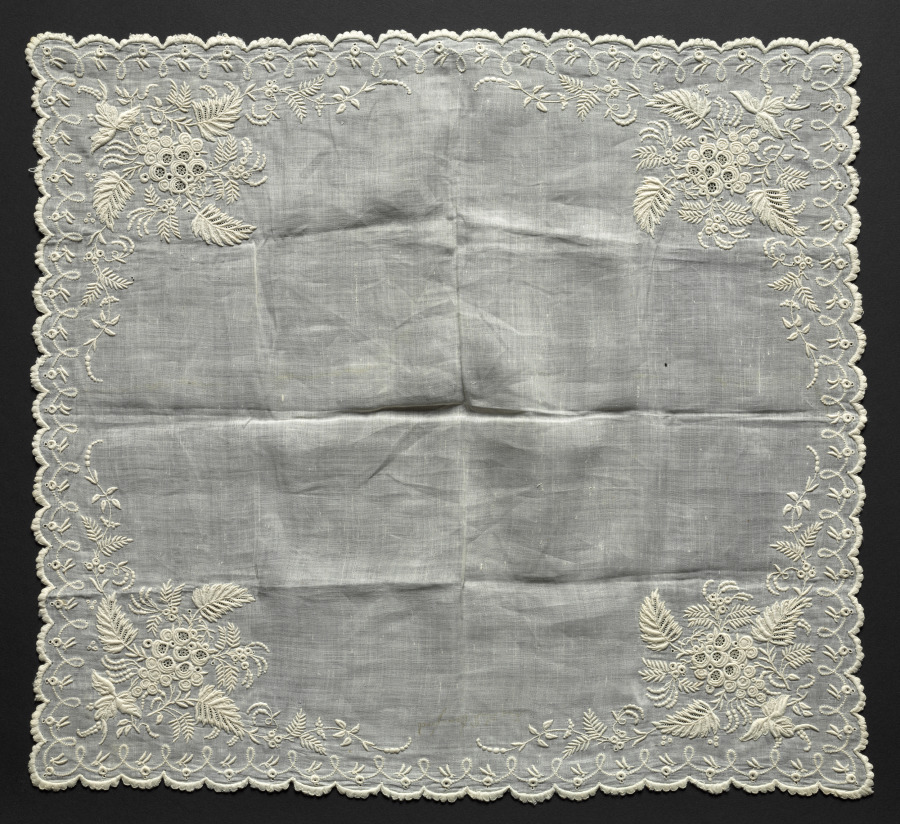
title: Embroidered Handkerchief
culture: Madeira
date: 1857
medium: Plain weave linen: linen embroidery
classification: Embroidery